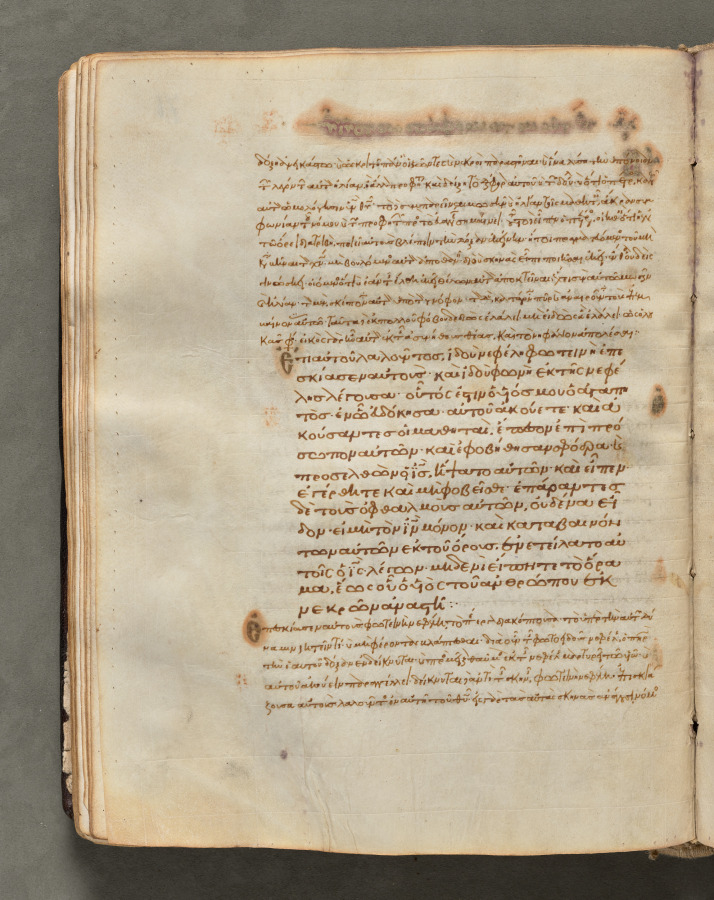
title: Text, folio 76 (verso), from a Gospel Book with Commentaries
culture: Byzantium, Constantinople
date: c. 1000–1100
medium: ink, tempera, and gold on vellum; leather binding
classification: Bound Volume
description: Each of the four gospels in this book opens on a page with brilliantly illuminated borders depicting the author of the text as well as birds-principally peacocks, symbols of the immortality of the soul-and fountains, representing the fountain of life and the salvation of the soul. This volume consists of 428 leaves with texts in Greek. Its level of sophistication suggests that it was probably written and decorated in a monastery in Constantinople.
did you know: Gospel Books were carried in procession through Byzantine churches.